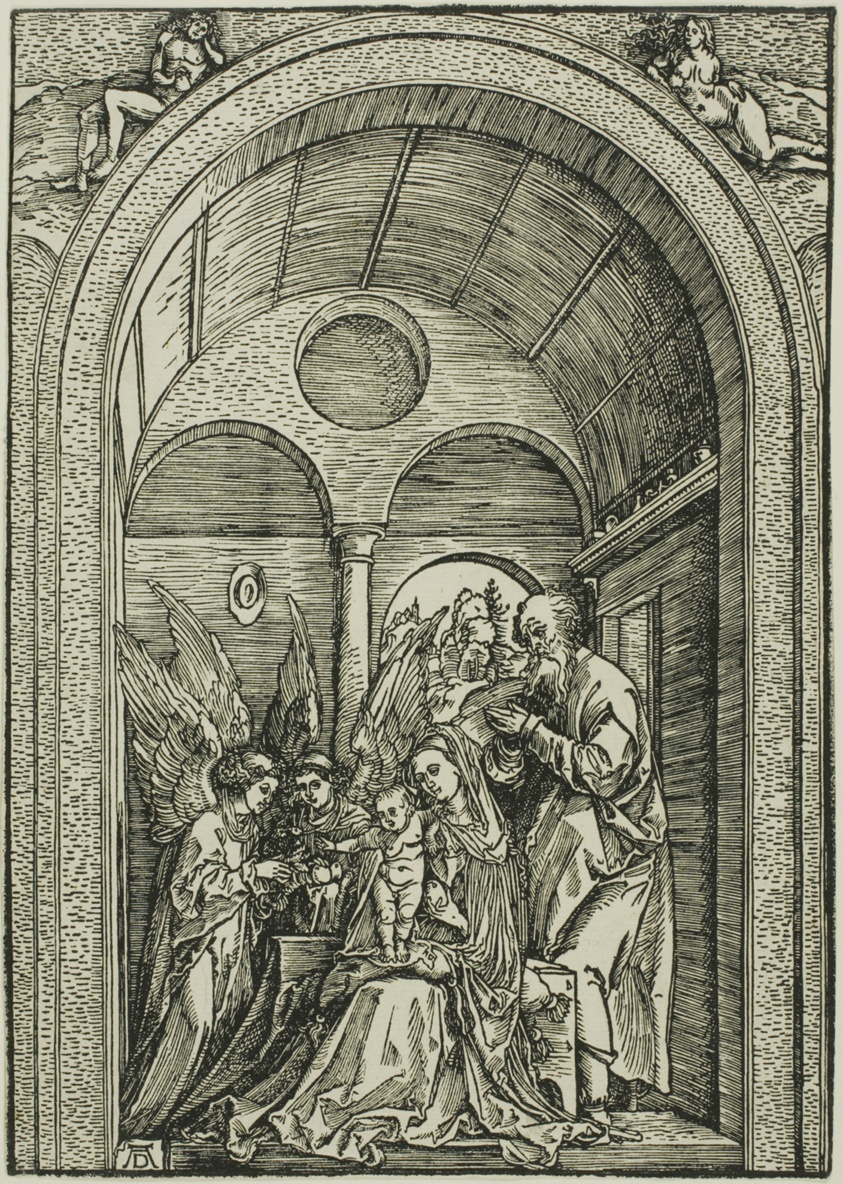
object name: Print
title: The Holy Family with Two Angels in a Vaulted Hall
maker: Albrecht Dürer (German, 1471-1528)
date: c. 1503–04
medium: Woodcut in black on ivory laid paper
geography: Germany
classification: woodcut; print; prints and drawing; paper